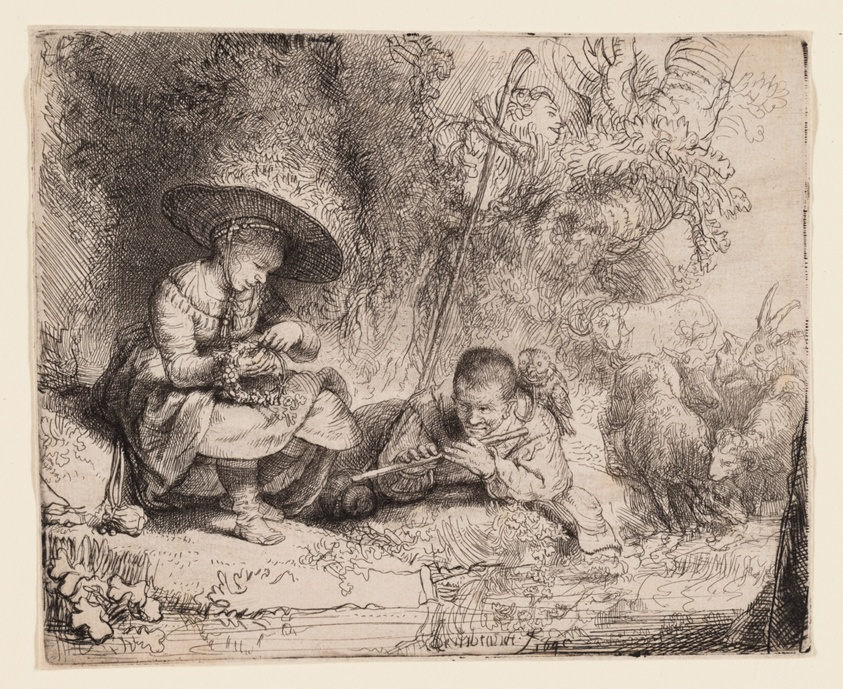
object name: Print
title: The Flute Player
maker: Rembrandt van Rijn (Dutch, 1606-1669)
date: 1642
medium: Etching and drypoint on ivory laid paper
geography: Netherlands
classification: etching; print; prints and drawing; paper; drypoint